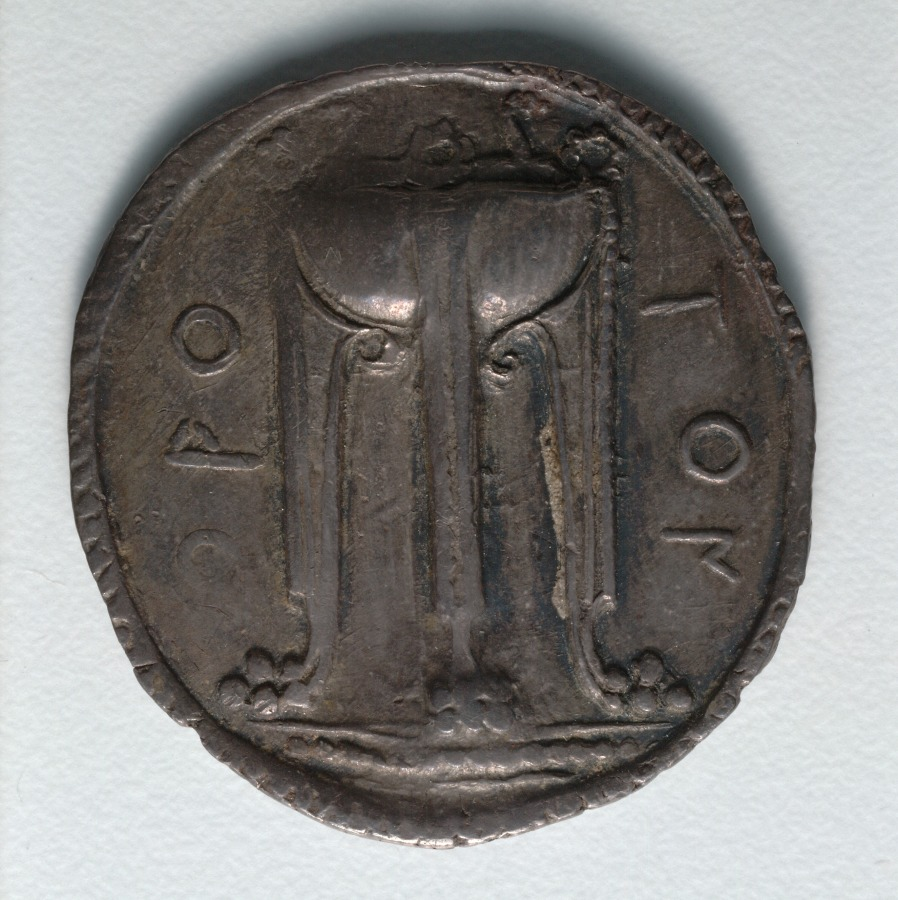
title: Stater: Tripod (obverse); Tripod Incuse (reverse)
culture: Greek, minted at Kroton (South Italy)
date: c. 530–510 BCE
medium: silver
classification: Coins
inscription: ϘΡΟ | ΤΟΝ